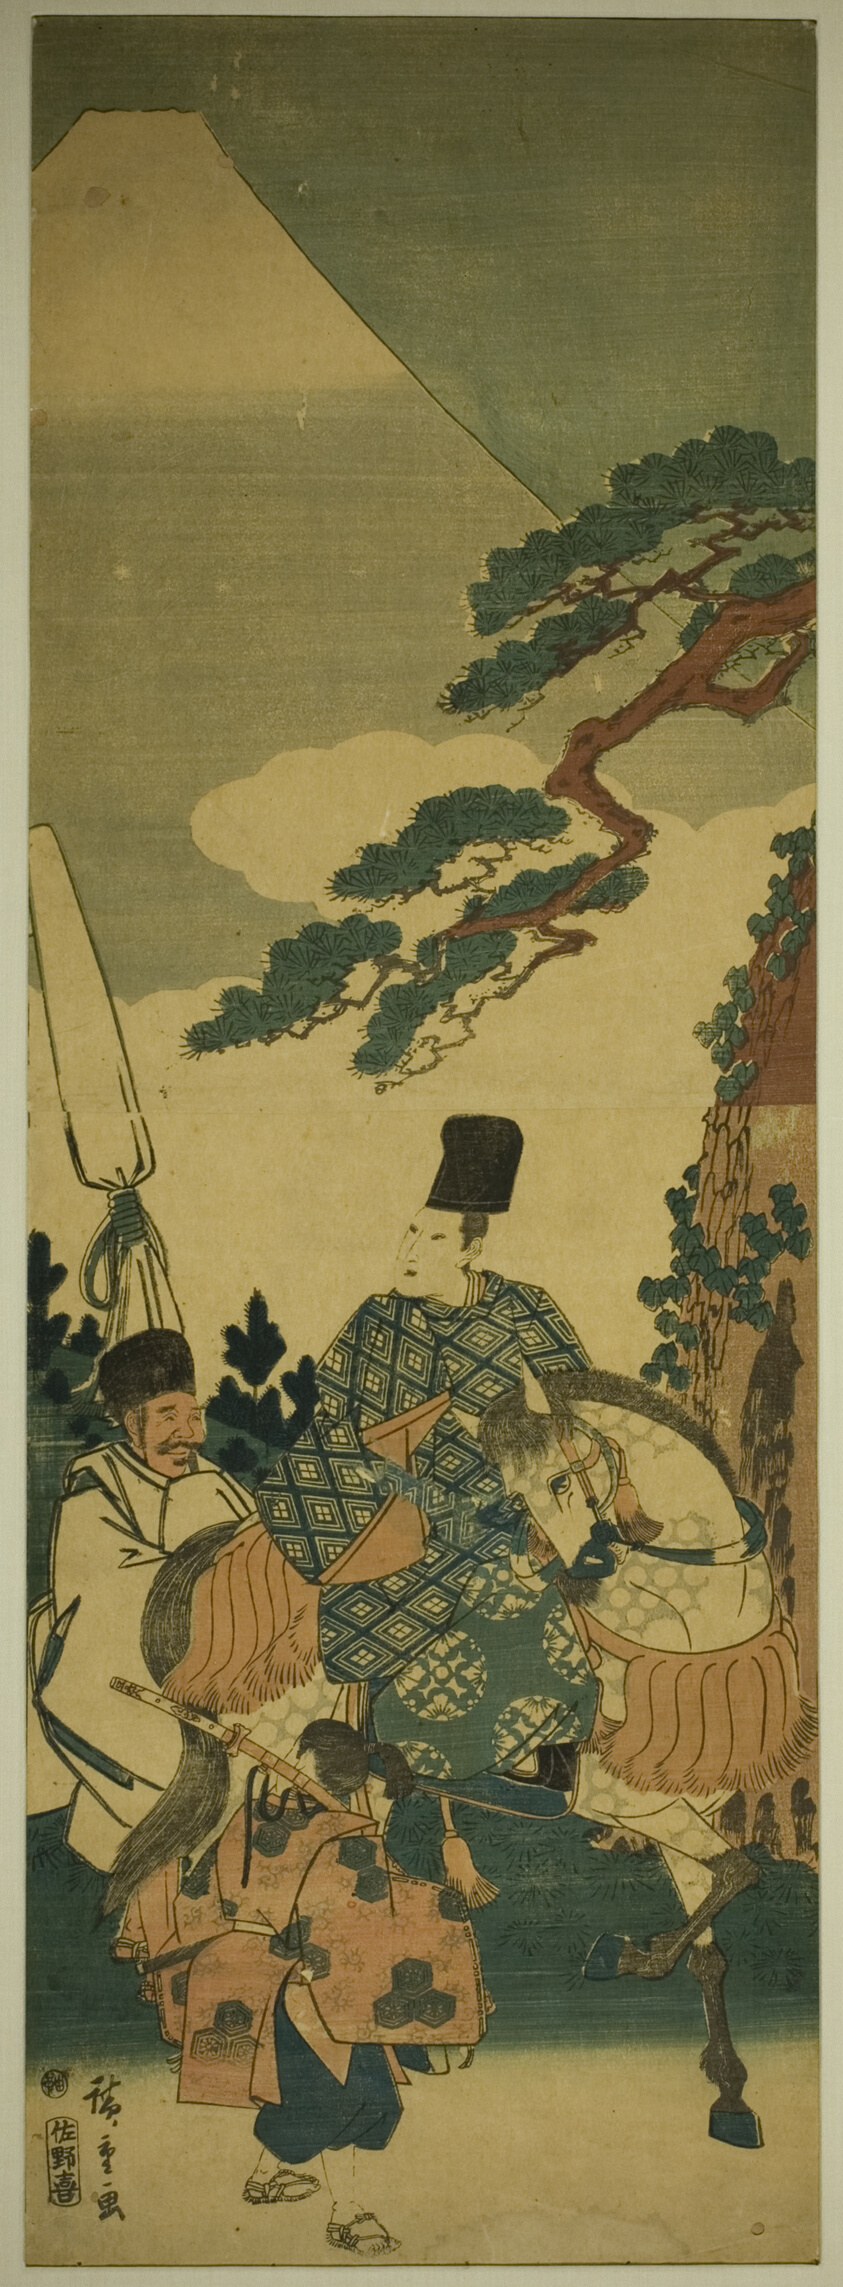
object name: Print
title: Ariwara no Narihira passing Mount Fuji on his journey to the East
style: Japanese (culture or style), edo (japanese period), Japanism, East Asian, asian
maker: Utagawa Hiroshige 歌川 広重; Japanese, 1797-1858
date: c. 1845/46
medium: Color woodblock print; vertical oban diptych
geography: Japan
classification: woodblock print; print; asian art